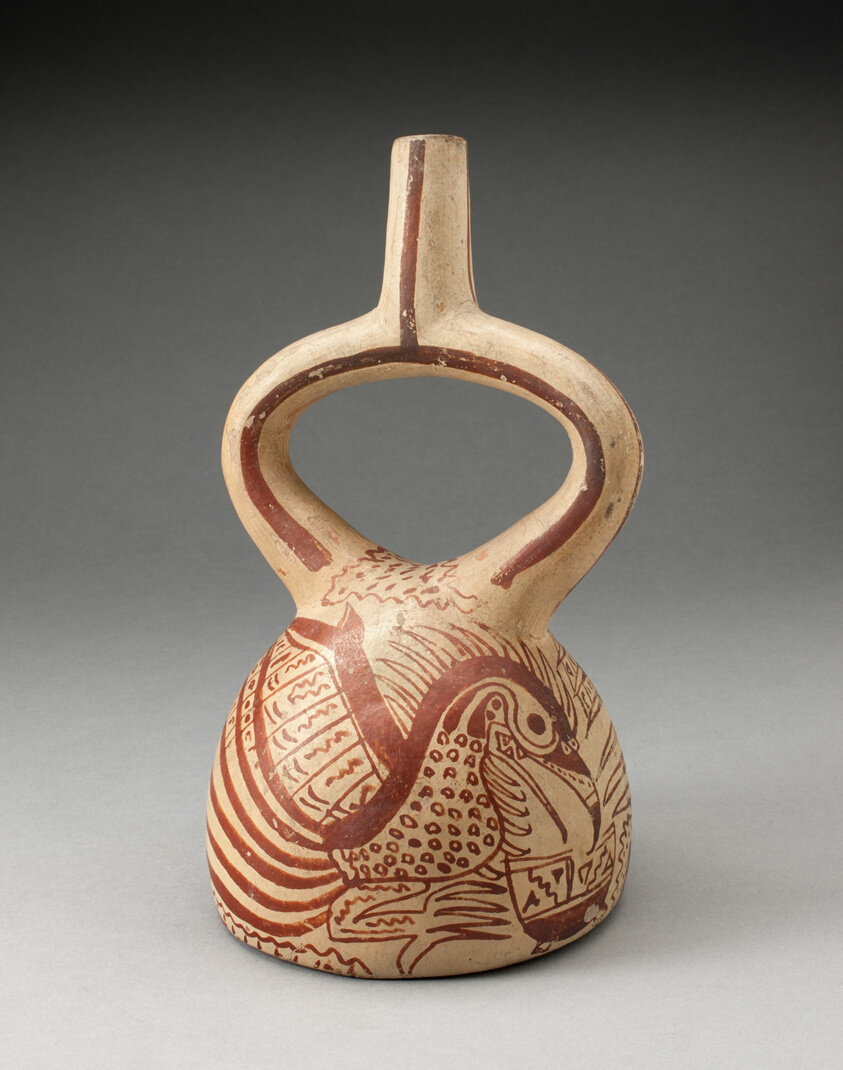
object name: Vessel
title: Stirrup Spout Vessel with Fineline Bird Motifs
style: moche, mochica v, mochica, early intermediate period, Pre-Columbian, americas, Arts of the Americas, andean, andes, south american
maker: Moche (North coast, Peru)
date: 100 BCE–500 CE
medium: Ceramic and pigment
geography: Peruvian North Coast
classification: earthenware; ceramics; vessel; art of the americas